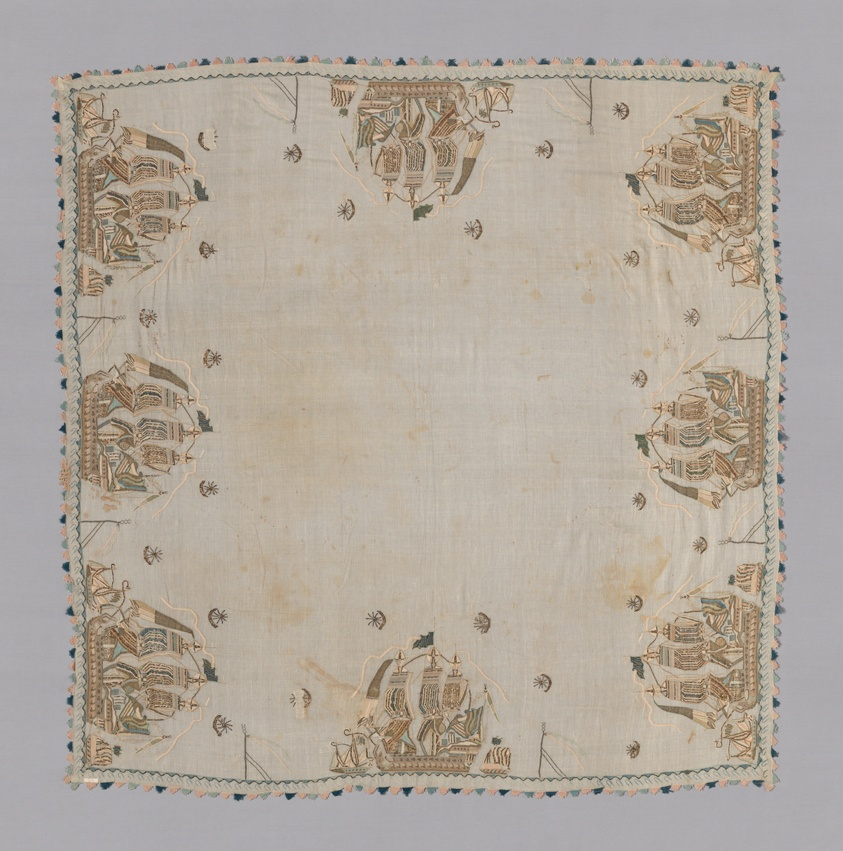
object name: Textile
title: Cover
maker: Turkey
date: 1801/25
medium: Silk and tinsel; embroidered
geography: Turkey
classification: textile; needlework (visual works); weaving